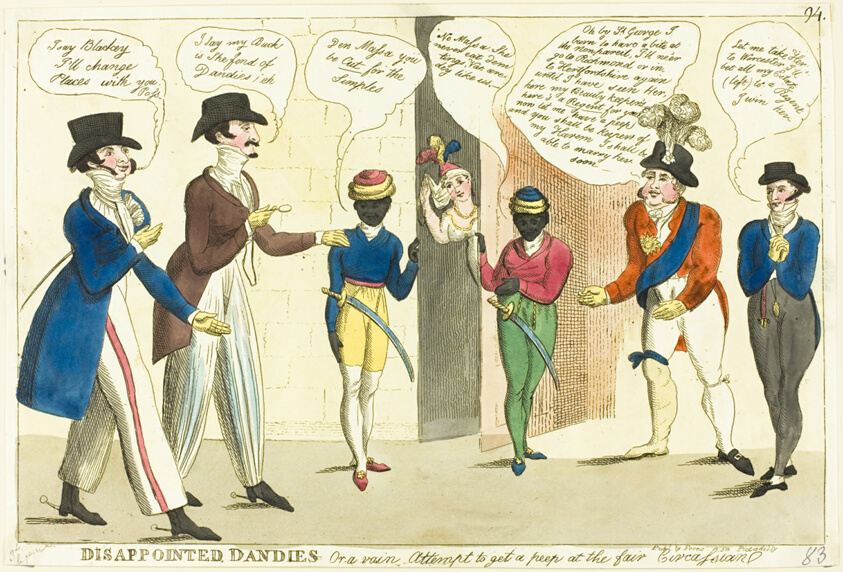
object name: Print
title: Disappointed Dandies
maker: Unknown Artist (English, early 19th century); published by S. W. Fores (English, active1785-1825)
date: published 1819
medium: Hand-colored etching on ivory laid paper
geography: England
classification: etching; print; prints and drawing